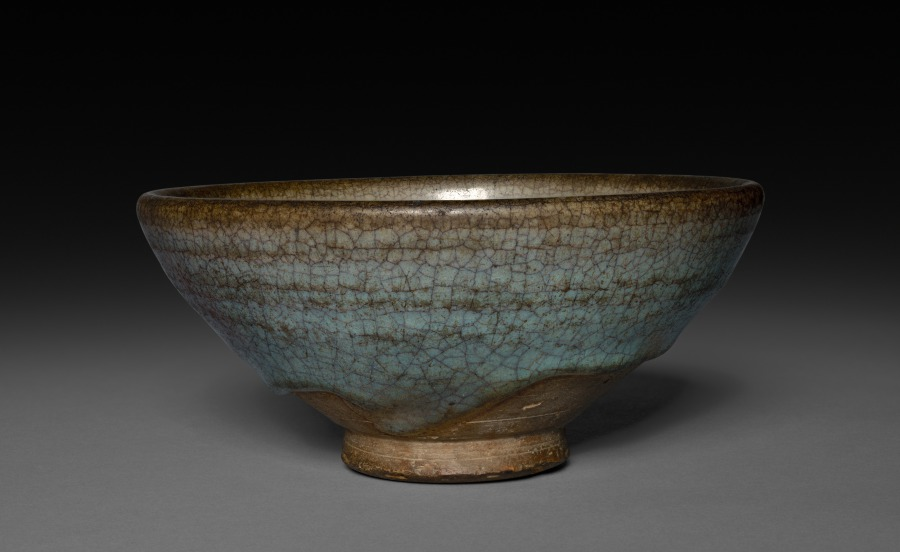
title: Bowl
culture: China, Yuan dynasty (1271-1368)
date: 1271–1368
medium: earthenware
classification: Ceramic